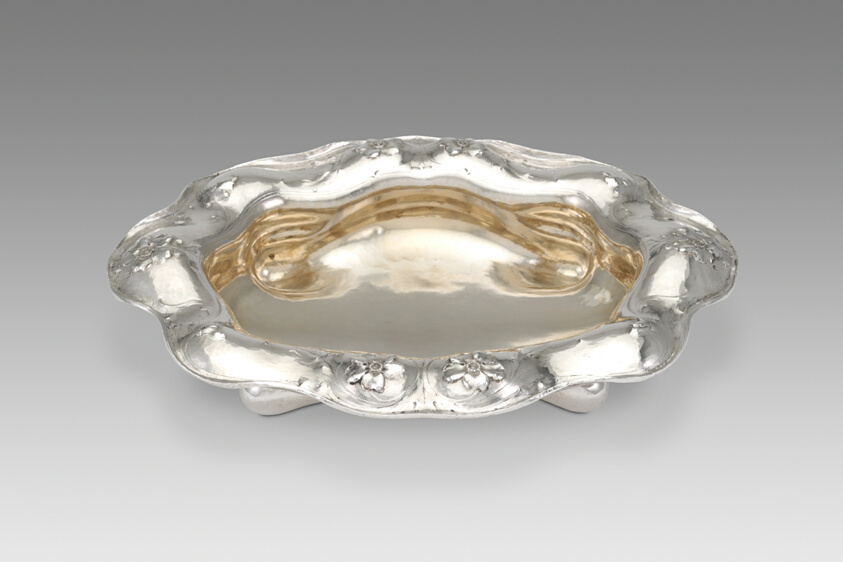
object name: Metalwork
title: Dish (part of a set)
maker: Gorham Manufacturing Company (American, founded 1831); Providence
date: 1900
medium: Silver with gold wash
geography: Providence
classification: dish (vessel); silver; american decorative arts; american arts; decorative arts